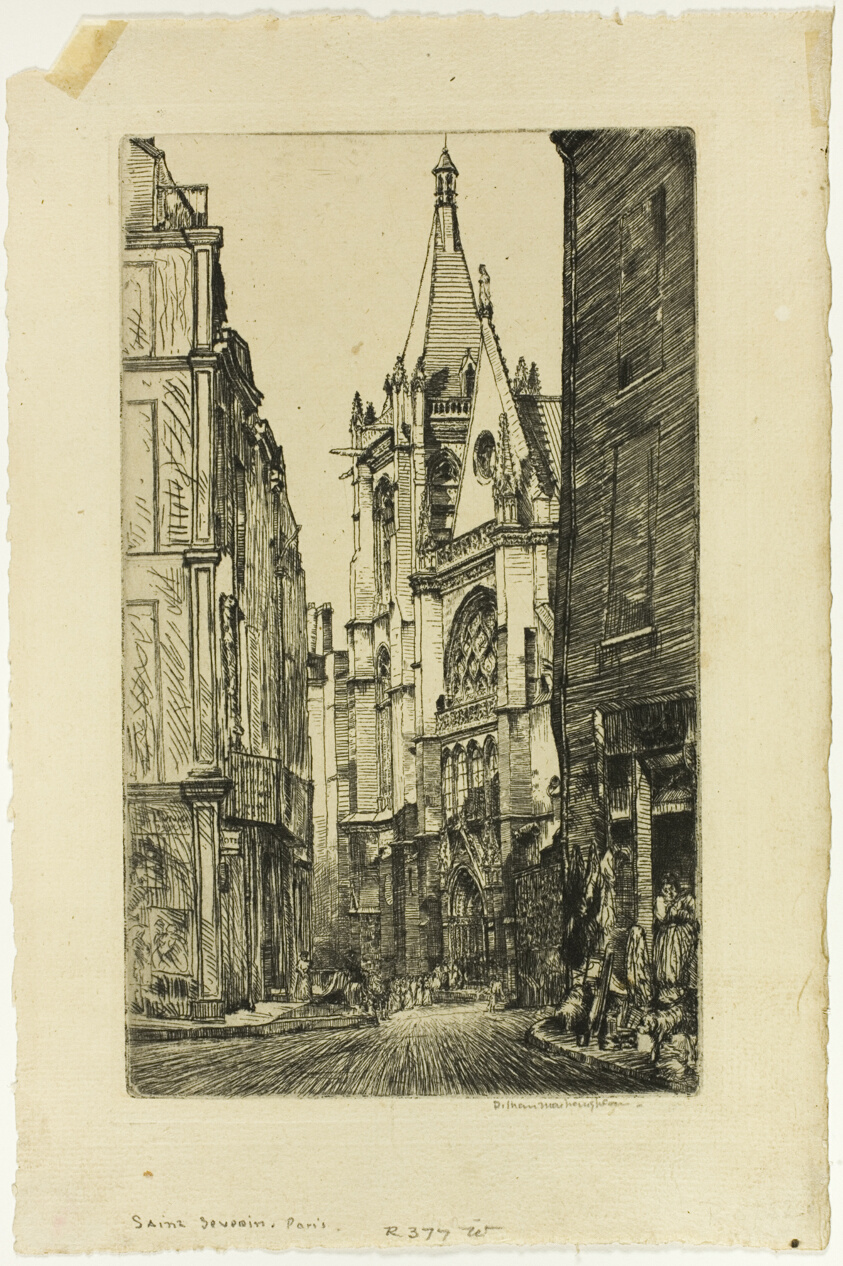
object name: Print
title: St. Séverin, Paris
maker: Donald Shaw MacLaughlan (American, born Canada, 1876-1938)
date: 1902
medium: Etching in black on cream laid paper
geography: United States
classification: etching; print; prints and drawing